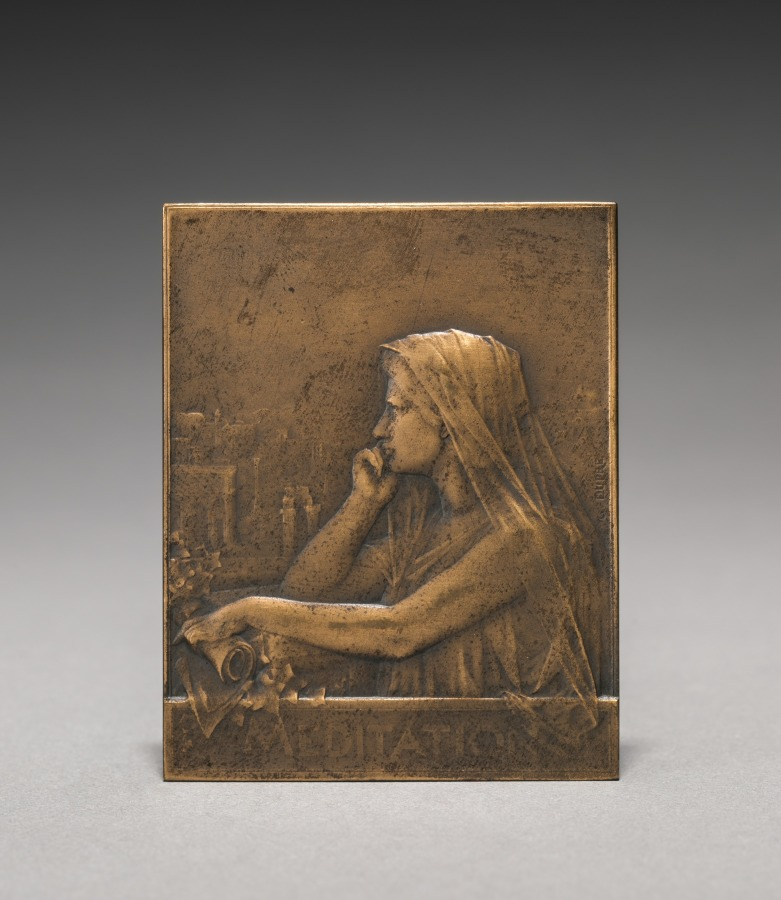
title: Medallion (obverse)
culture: France, 19th-20th century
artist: Jules Dupré (French, 1811–1889)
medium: bronze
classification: Metalwork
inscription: "Meditation"; signed: "G. Dupré."